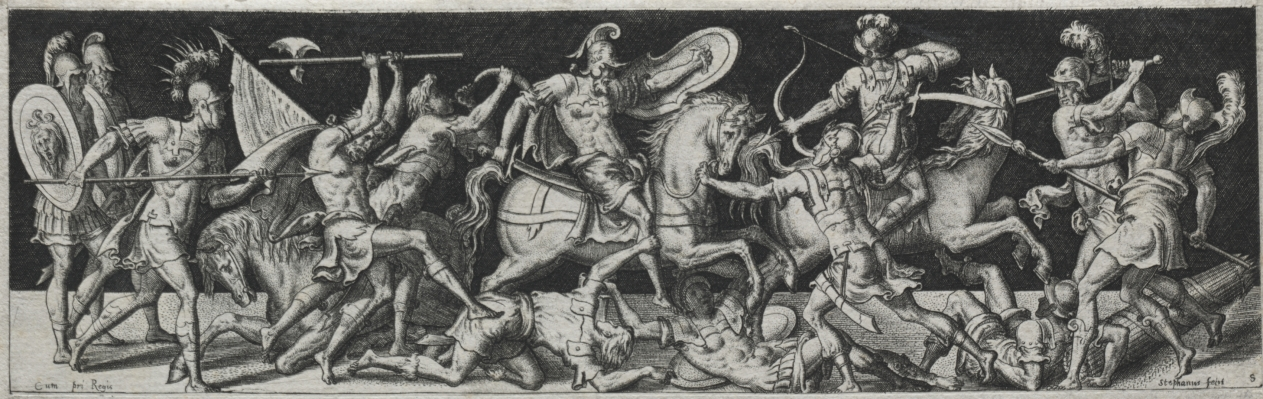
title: Combats and Triumphs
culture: France, 16th century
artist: Etienne Delaune (French, 1518/19-c. 1583)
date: probably 1560s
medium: engraving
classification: Print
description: Etienne Delaune (French, 1518/19-1583) Combats and Triumphs, probably 1560s Engravings Gift of Leonard C. Hanna 1924.671-.674 The Triumph of Bacchus Battle of Men and Animals Combat of the Naked Men Battle of the Centaurs and the Lapiths The four prints shown here come from a series of twelve known as the Combats and Triumphs. The friezelike composition reflects the artist's study of marble relief carvings on Greek and Roman sarcophagi (coffins), here reduced to a preciously small setting. Against a flat, stagelike background, Delaune's balletic warriors engage in a Mannerist version of artificial war. Etienne Delaune was inspired by the art created at Fontainebleau, but he worked in Paris and then Strasbourg during the late 1500s. His small, exquisitely executed engravings reflect his training as a goldsmith and his work as a medallist.